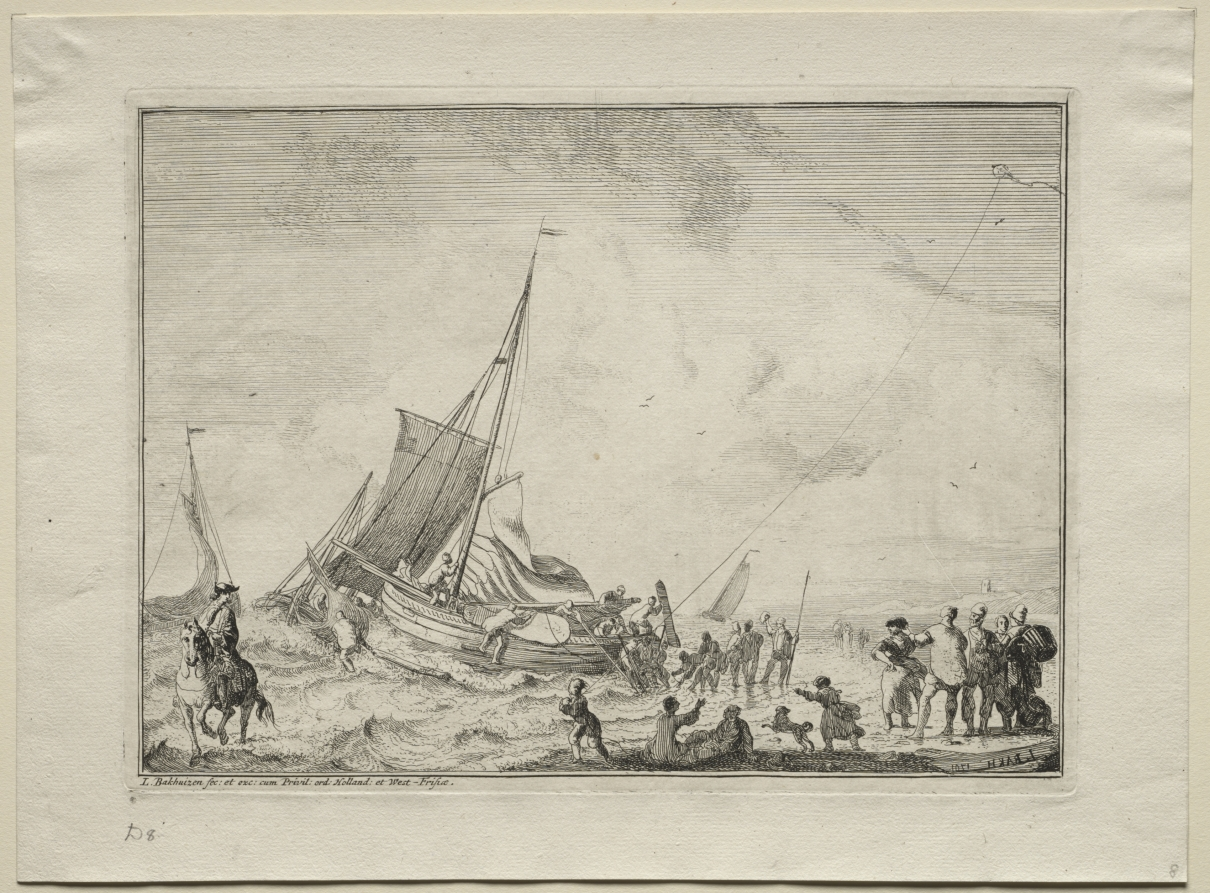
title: Launching a Ship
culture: Netherlands, early 18th century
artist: Ludolf Backhuysen (Dutch, 1631–1708)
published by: Ludolf Backhuysen (Dutch, 1631–1708)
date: 1701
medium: etching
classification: Portfolio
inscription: lower left, in plate: L. Bakhuizen fec: et exc: cum Privil: ord. Holland: et West-Frisiæ. ; lower right, in plate: L BAKH 1701[reversed] ; lower left, in graphite: D8. ; lower right, in graphite: 8